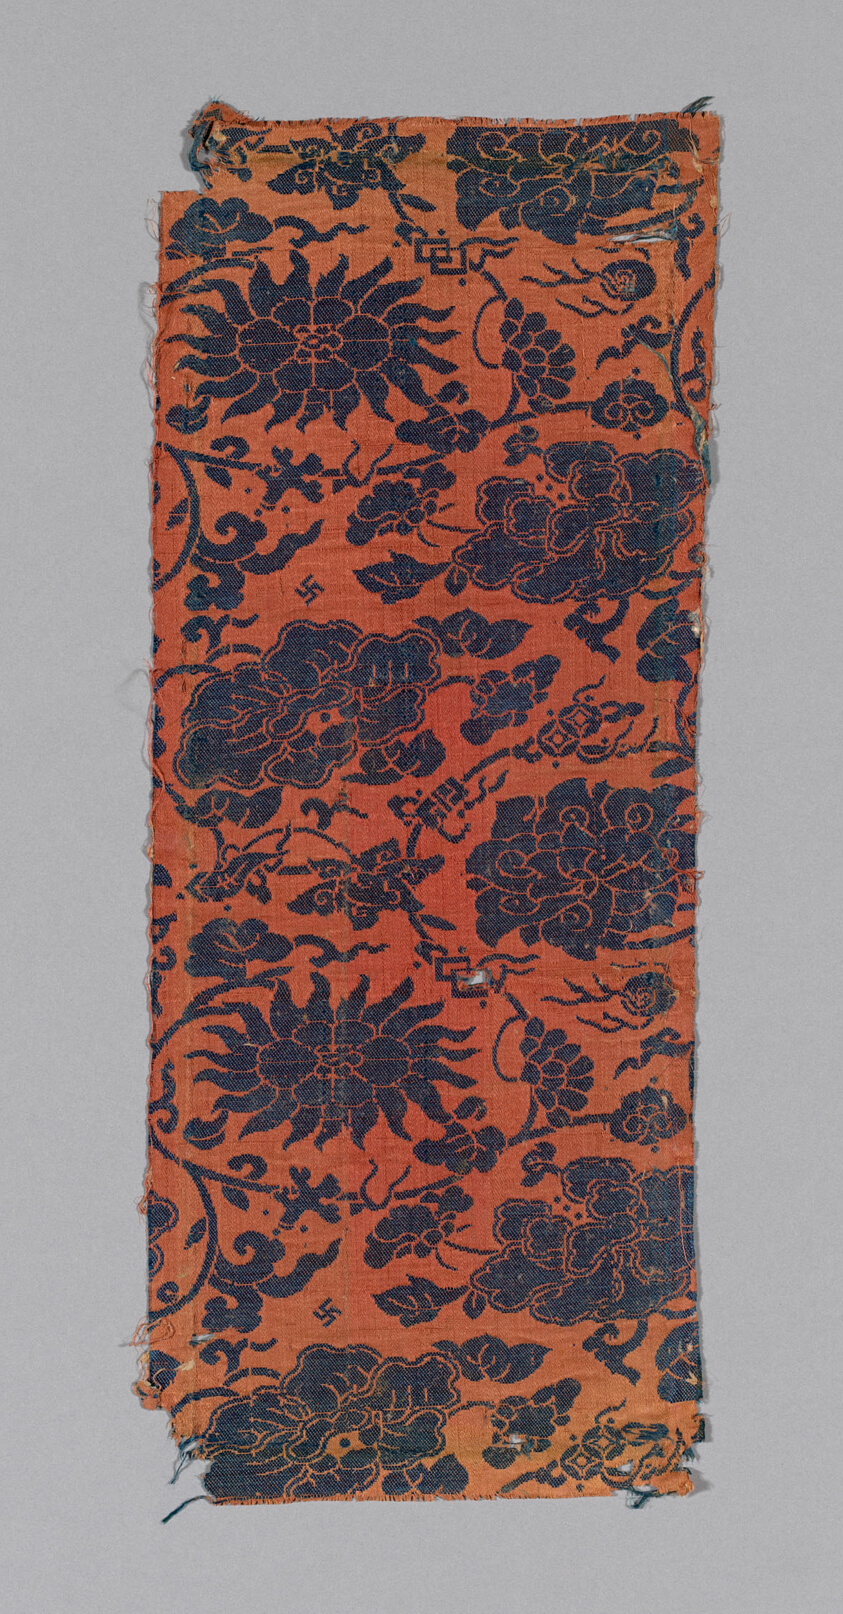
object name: Textile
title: Sutra Cover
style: ming, Chinese (culture or style), East Asian, asian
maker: China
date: Ming dynasty (1368–1644), c. 1590s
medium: Silk, warp-float faced 4:1 satin weave with supplementary patterning wefts bound in weft-float faced 1:4 satin interlacings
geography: China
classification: textile; weaving